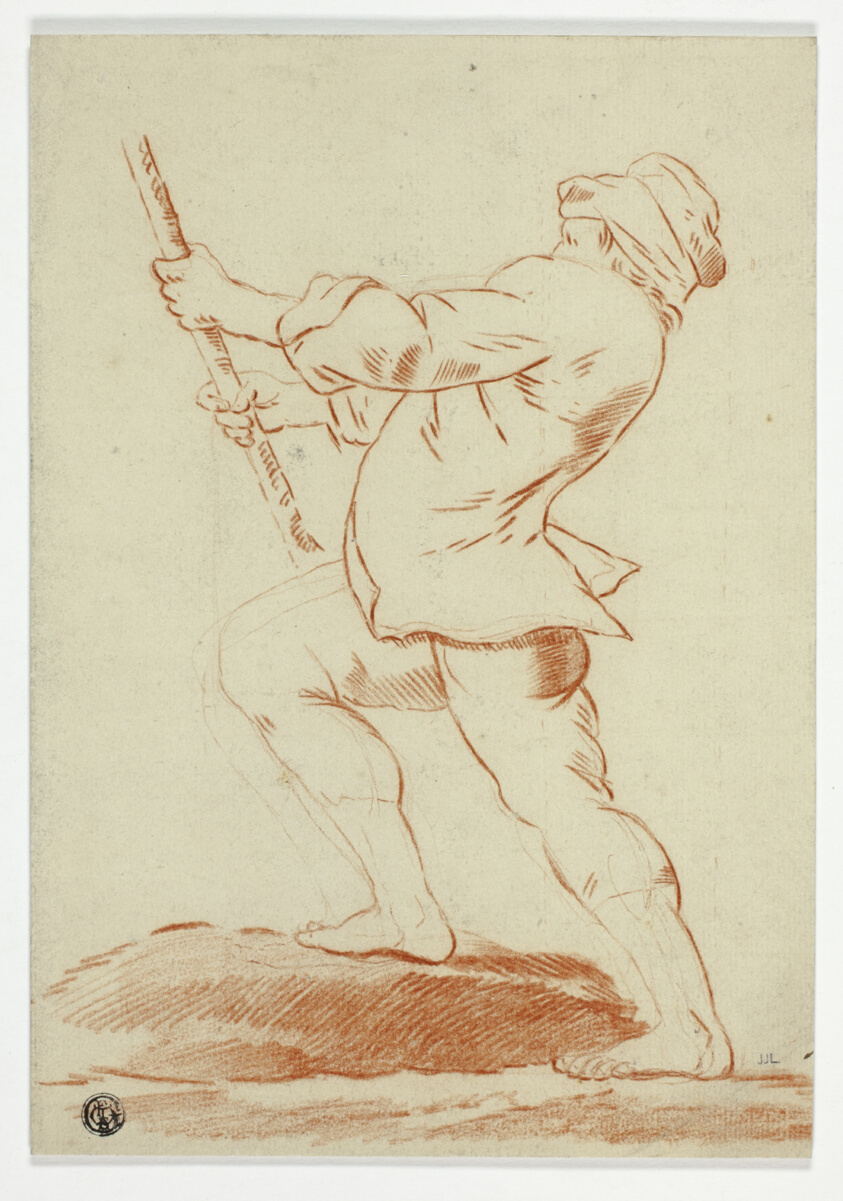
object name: Drawing and Watercolor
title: Boy Holding Staff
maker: Andrea Lilio (Italian, 1555-1642)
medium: Red chalk, on ivory laid paper, laid down on ivory wove board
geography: Italy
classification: chalk; drawings (visual works); prints and drawing